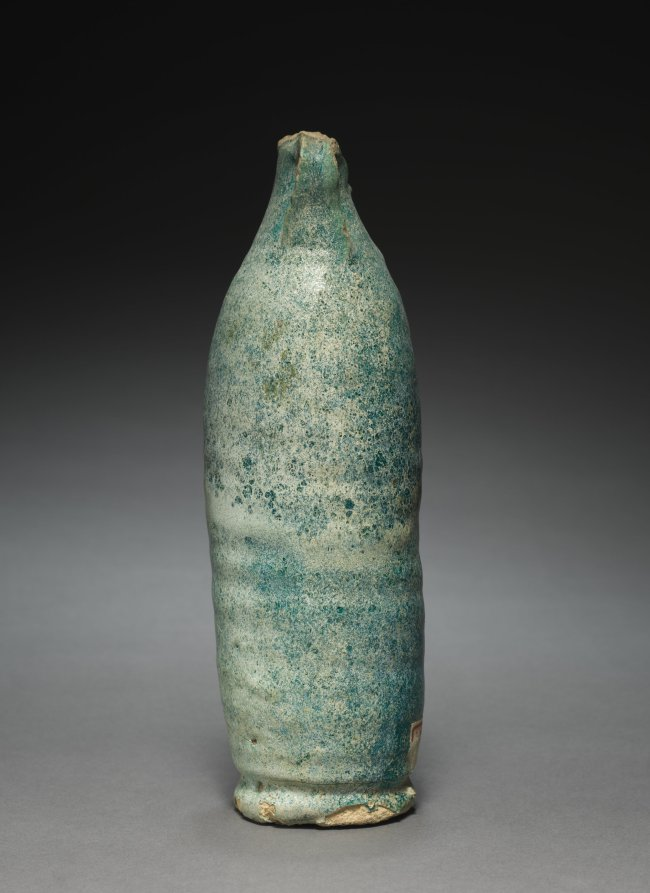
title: Vase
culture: Parthian Empire (247 BCE–224 CE)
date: 1–200 CE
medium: terracotta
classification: Ceramic